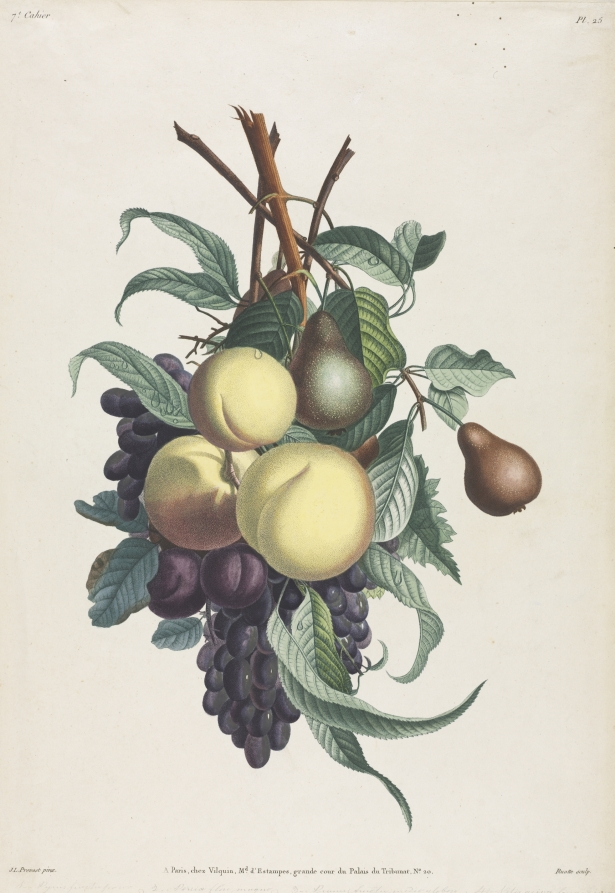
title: Collection des fleurs et des fruits: Branches de rousselet, pêche, prune et raisin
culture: France, early 19th Century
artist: Jean Louis Prévost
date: 1805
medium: stipple engraving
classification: Print